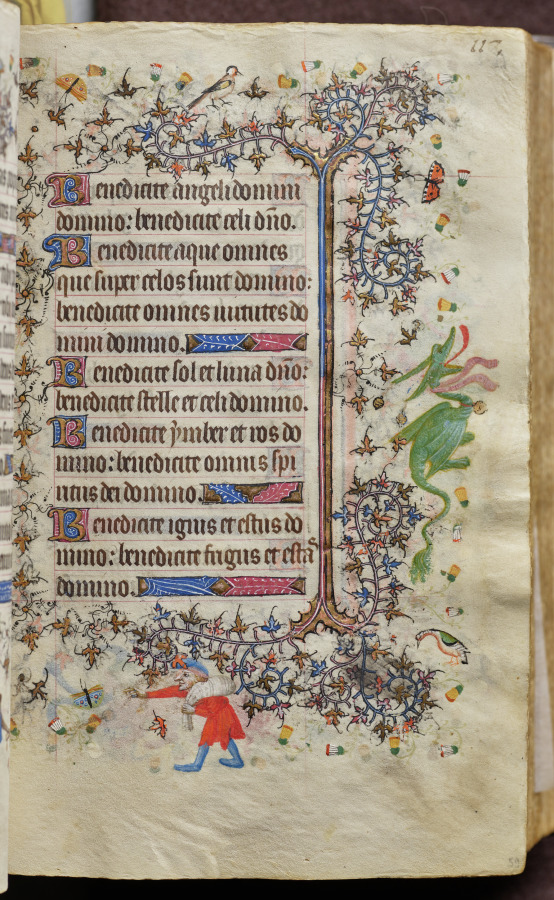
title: Hours of Charles the Noble, King of Navarre (1361-1425): fol. 59r, Text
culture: France, Paris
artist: Master of the Brussels Initials and Associates (French)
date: c. 1405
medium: ink, tempera, and gold on vellum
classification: Bound Volume